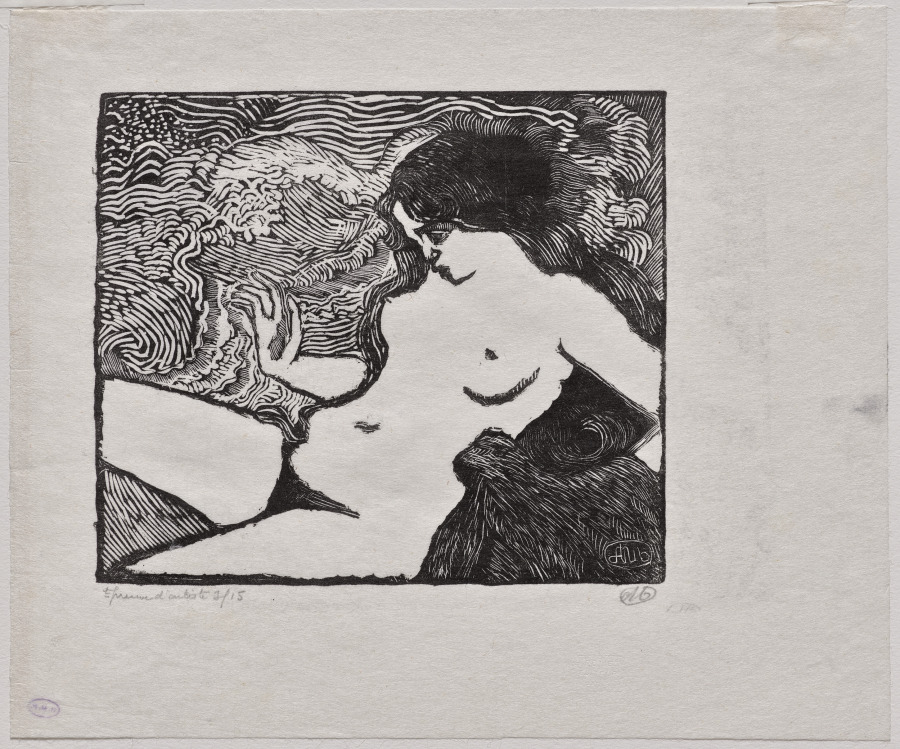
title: Wave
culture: France, late 19th Century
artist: Aristide Maillol (French, 1861–1944)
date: 1895–98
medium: wood engraving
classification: Print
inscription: Inscribed: "Epreuve d'artiste 3/15"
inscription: initialed in pencil with Maillol's monogram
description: The color woodcuts of Katsushika Hokusai were highly esteemed. One of his most famous prints, The Great Wave off Kanagawa (1823-31), is a striking image of an enormous cresting wave. Maillol exploited the curling water motif to achieve an energetic linear design that surrounds and cushions the nude woman but also creates a lively contrast to the large, flat white shape of her body. A precursor to Maillol's future work as a sculptor, Wave reveals the artist's interest in conveying the sensual curves of the female form.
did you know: This print dates from a period when Aristide Maillol used his wife, Clotilde, as his primary model.